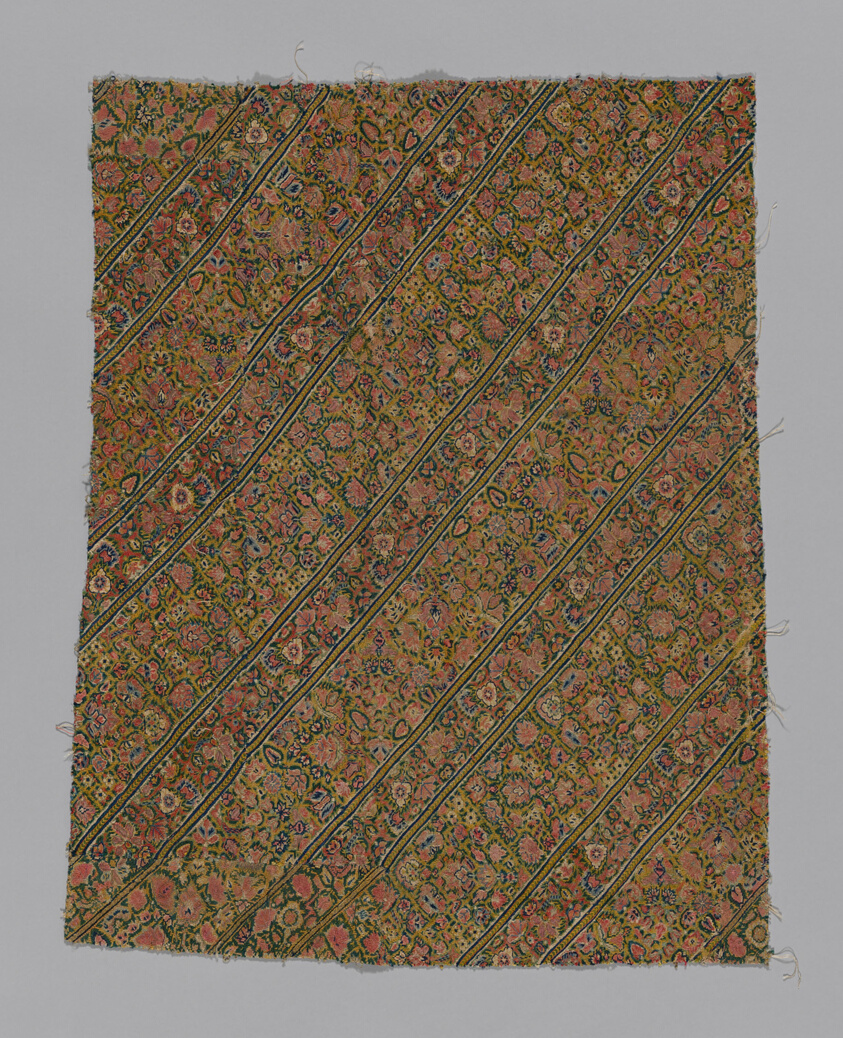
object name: Textile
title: Panel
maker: Iran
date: 18th century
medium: linen and silk; tapestry stitch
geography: Iran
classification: textile; needlework (visual works)